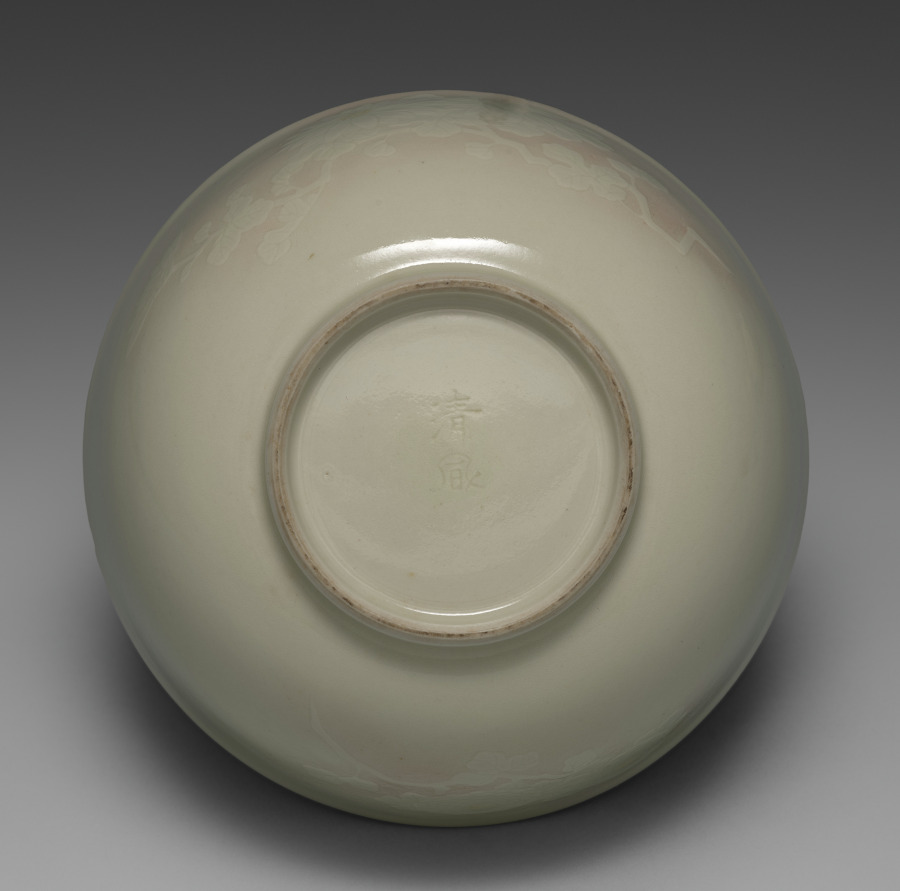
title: Sweets Bowl with Chrysanthemums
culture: Japan, Taishō period (1912–26) or Shōwa period (1926–89)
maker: Seifū Yohei IV (Japanese, 1872–1951)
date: 1914–46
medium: Porcelain with molded and carved design, underglaze color, and cream glaze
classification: Ceramic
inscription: 清風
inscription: 成山清風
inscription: 清風造 【印】 清風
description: Sweets bowls hold the confections enjoyed when drinking tea. This bowl and CMA 2022.206 offer an important lesson in appreciating Yohei IV’s ceramic practice. While they have the same design and shape and are made with the same materials, the execution of the pieces makes them entirely different after close inspection, thereby demonstrating the range of possible production results from a single template. Each bowl has the same composition of two different types of chrysanthemum flowers, one with long, slim, knifelike petals and the other with short, rounded, multilayered petals, shown running around its surface in low relief. The centers of the flowers are painted with yellow under the glaze. Yohei III formulated a number of new underglaze colors during his career, and this is likely one of them. For both bowls here, Yohei IV used his father’s kanpakuji formula, with underglaze pink for the gradated wash of color surrounding the flowers. The storage box lid provides abbreviated descriptions of the complex processes used in the surface decorations. It identifies the bowl as “Sweets dish with carved picture of chrysanthemum in kanpakuji.” The box has Yohei IV’s signature on the lid’s exterior, along with a seal reading “Seizan Seifu” 成山清風. The ink inscriptions are done in an elegant semiformal calligraphy. This bowl is more subtle and smooth in both the effect of the glaze and the execution of the relief. The designs are centered on the body between rim and foot. A closer look at the delineation of the flower petals reveals that the designs differ at times with respect to which petals appear in front or behind others. The centers of the bases of both bowls are incised with “Seifu” in a manner matching many other works by Yohei IV, although there are slight differences. As one might expect from the other differences in the bowls, the characters on the base of this subtle bowl are gentler, finishing in a tapering out of the strokes. Those on the bold bowl, CMA 2022.206, end in triangular pinheads.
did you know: This ivory and pink bowl by Seifū Yohei IV show his father’s “bright-jewel white porcelain” technique.